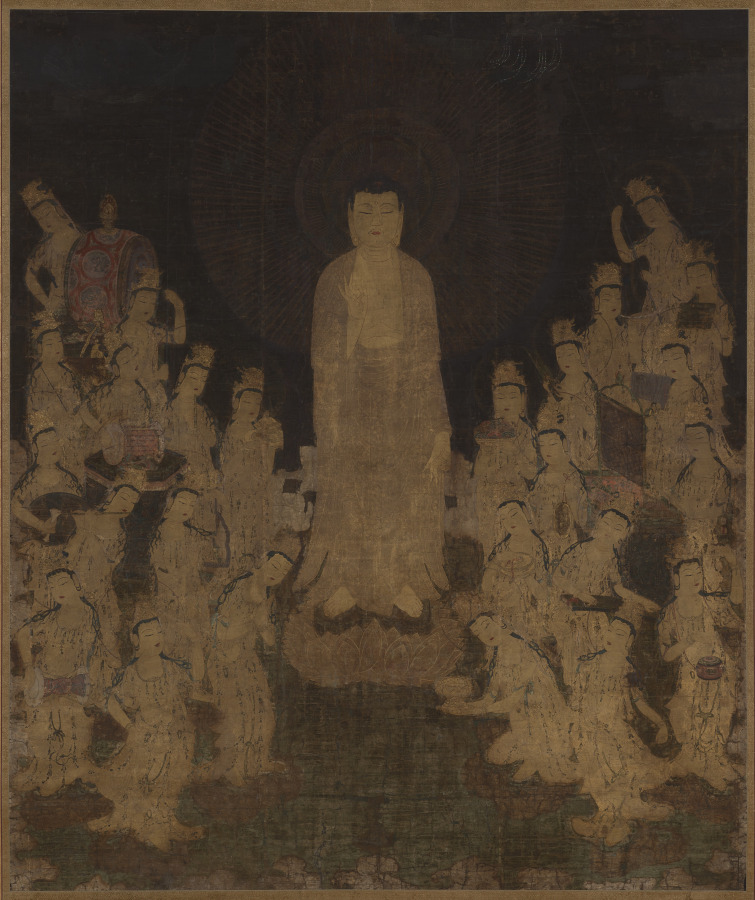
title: Welcoming Descent of Amida with Twenty-Five Bodhisattvas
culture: Japan, Nanbokuchō period (1336–92)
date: mid-1300s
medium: Hanging scroll; ink, color, gold, silver, and cut gold on silk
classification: Painting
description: This painting depicts the Buddha Amida arriving to escort a dying person to his Pure Land, or Western Paradise. He is attended by an entourage of 25 bodhisattvas, enlightened beings who are committed to serving others, many of whom provide orchestral accompaniment to herald the momentous occasion. The bodhisattva Kannon kneels, holding a lotus dais for the deceased to ride to their destination.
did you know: One of the percussive instruments played by the bodhisattvas in the painting is called a paiban or hakuban in Japanese.